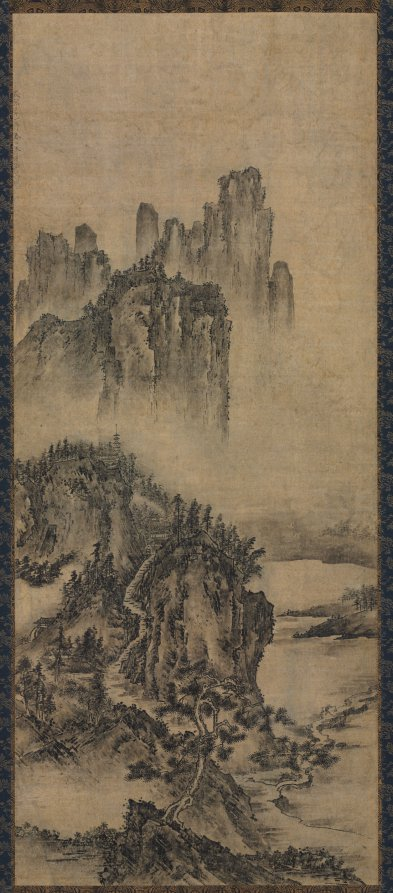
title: Landscape with a Distant Temple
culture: Japan, Edo period (1615–1868)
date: 1600s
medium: hanging scroll; ink on paper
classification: Painting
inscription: apocryphal inscription dated 1490 on the upper left edge of the painting.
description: A traveler has presumably descended from the distant temple compound that consists of several buildings linked together by a winding trail lined with steps. The highest point in the compound is occupied by the most sacred structure in Buddhist temple architecture: a mulitroofed pagoda. This rugged landscape, with its towering craggy peaks, pine forests, and river, typifies the idealized image of religious sanctuary in East Asian medieval ink painting.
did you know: This painter emulated the style of Sesshū Tōyō (1420–1506) a Japanese artist who traveled to China to study painting.